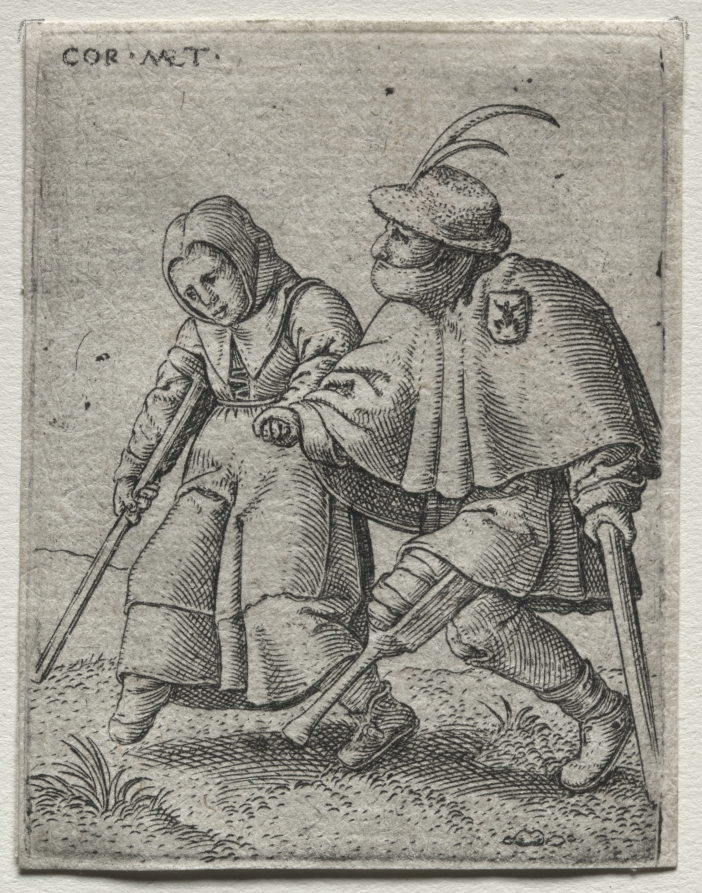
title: Dancing Cripples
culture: Flanders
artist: Cornelis Massys (Flemish, 1510/11–1556/57)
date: 1538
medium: engraving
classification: Print